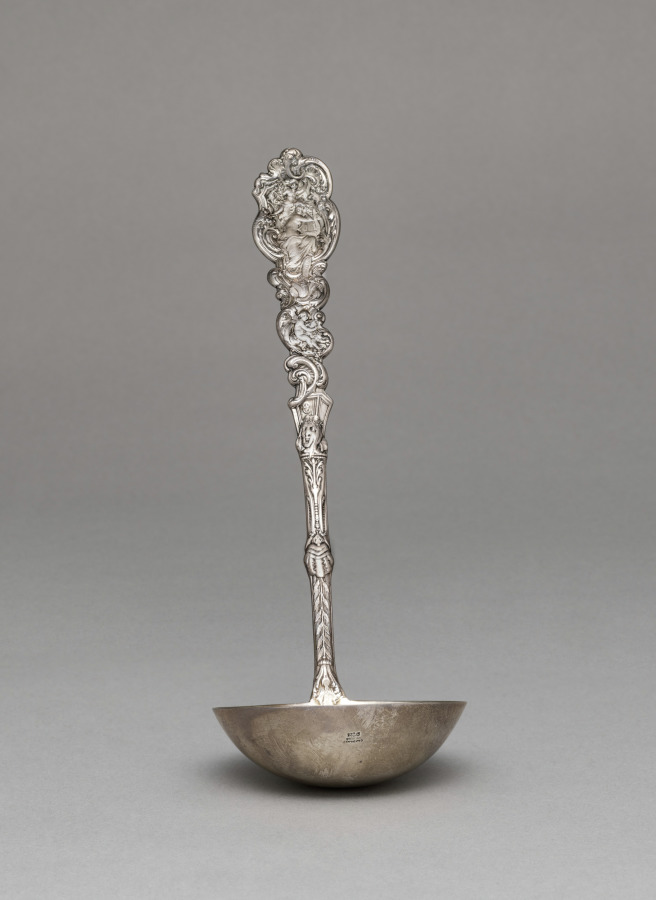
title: Ladle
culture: America, New York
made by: Gorham Manufacturing Company (America, est. 1831)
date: c. 1905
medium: silver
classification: Silver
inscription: engraved "AFR" on back of handle end.